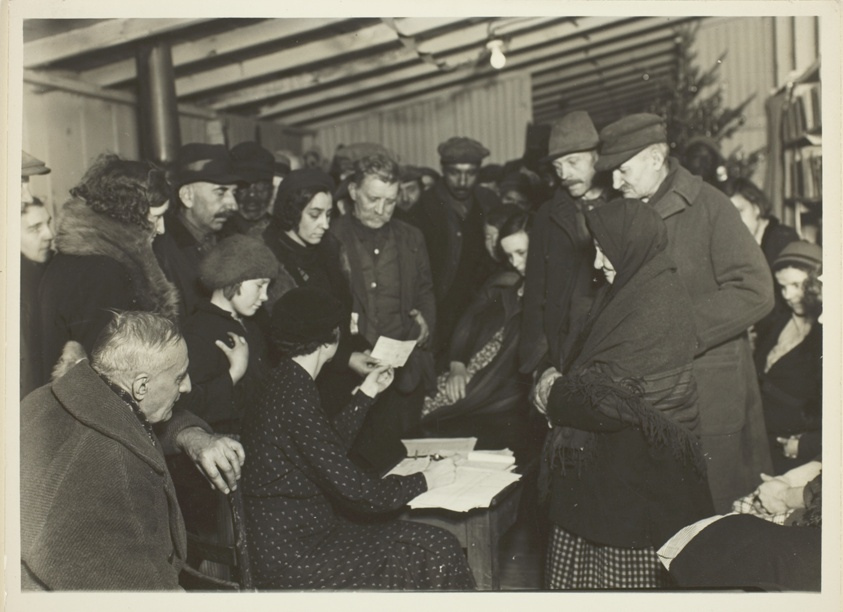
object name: Photograph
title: WPA Relief Checks Given Out To Unemployed Miners, Scott's Run, West Virginia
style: Photo League, 20th Century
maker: Lewis Wickes Hine (American, 1874–1940)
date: 1936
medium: Gelatin silver print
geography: United States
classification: gelatin silver (developing-out-paper) pr; photographic process; photography; photograph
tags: Collected by Hugh Edwards, documentary